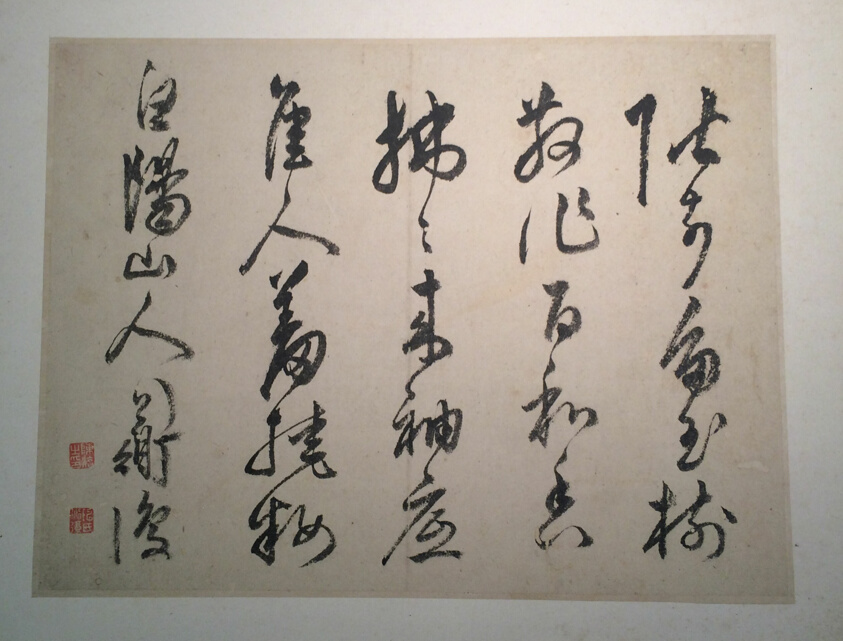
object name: Painting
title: Calligraphy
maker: Chen Chun (Chinese, 1483-1544)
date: Ming Dynasty (1369–1620)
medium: Album leaf; ink on paper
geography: China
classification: album leaf; asian art; painting